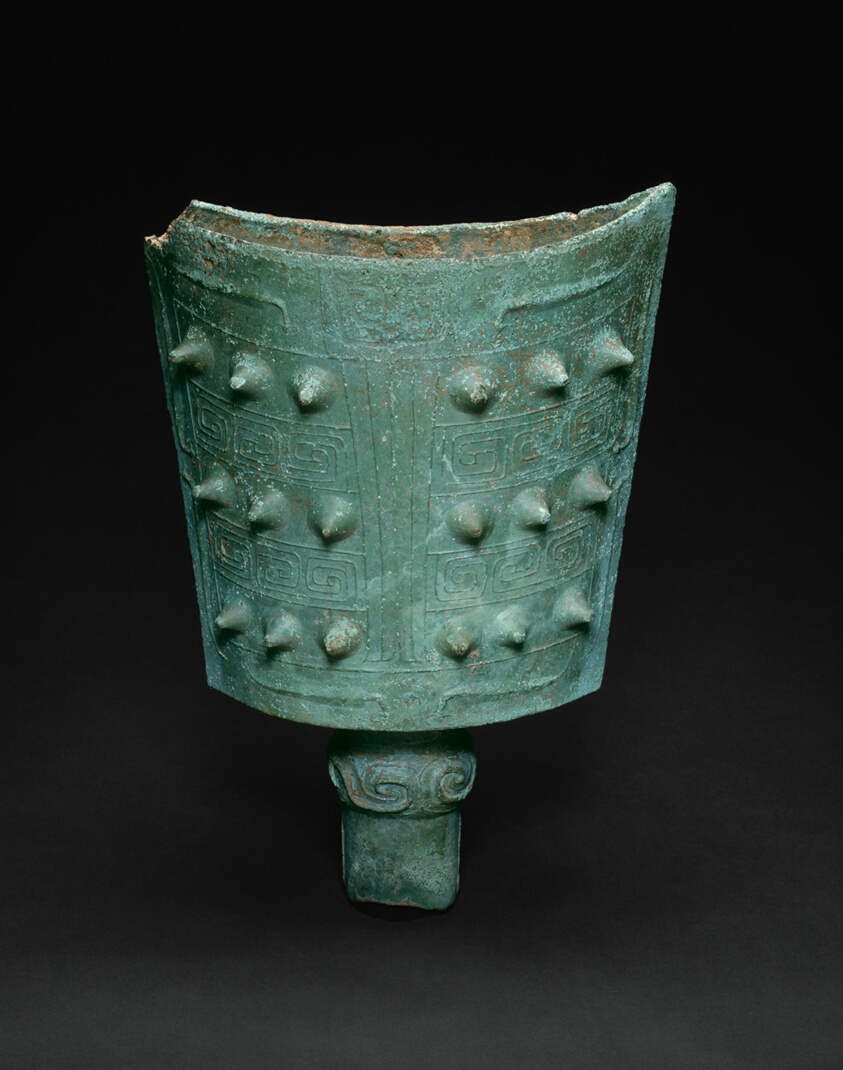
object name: Religious/Ritual Object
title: Bell (nao)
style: Chinese (culture or style)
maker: China, probably Hunan province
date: Western Zhou dynasty (1046–771 B.C.)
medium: Bronze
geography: China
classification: bronze; asian art; ritual objects